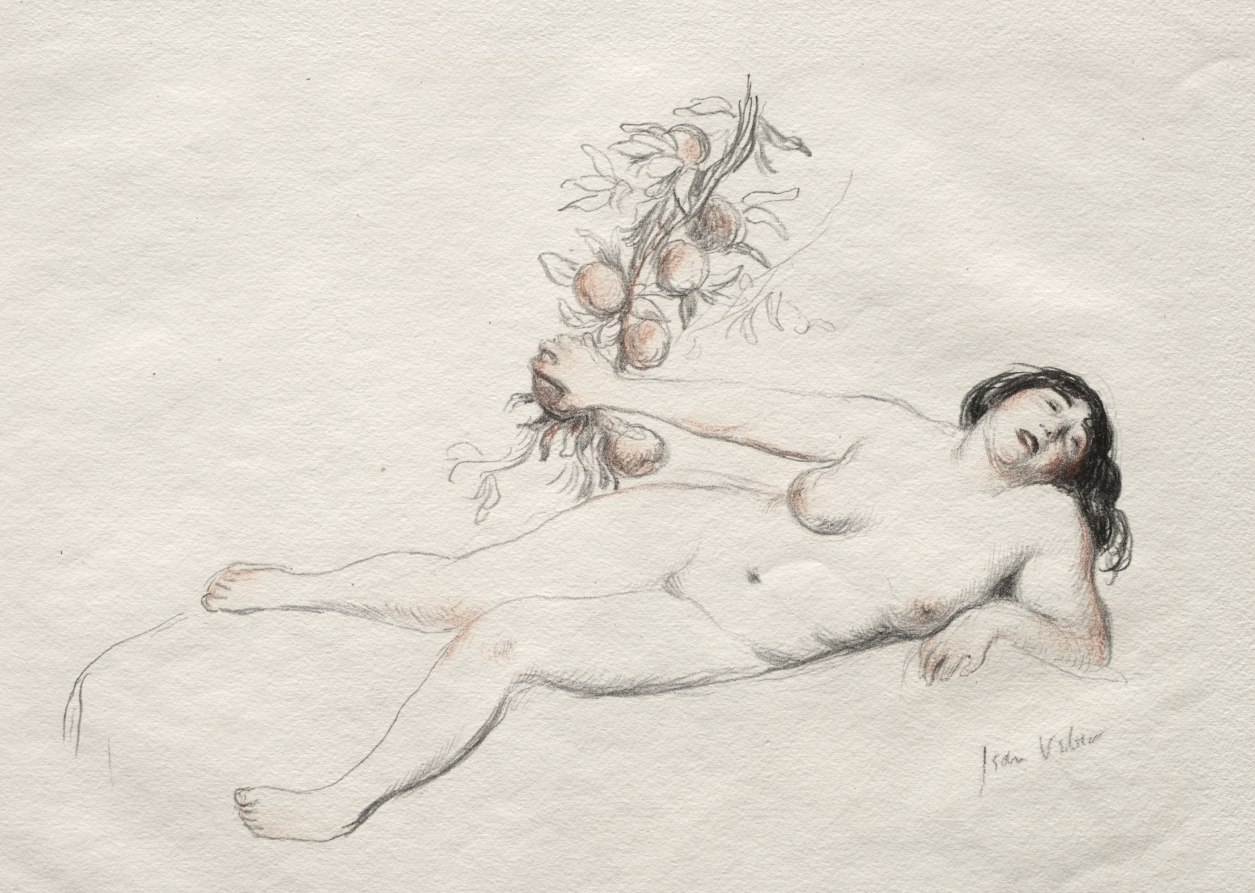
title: Eve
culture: France, 19th century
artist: Jean Veber (French, 1864–1928)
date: c. 1885–1928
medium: lithograph, hand colored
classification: Print